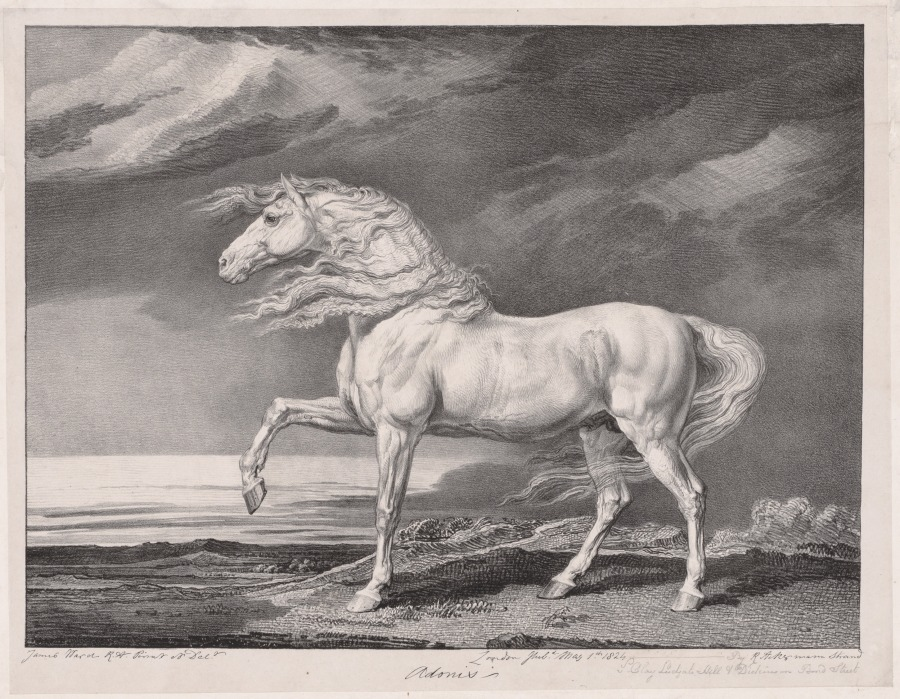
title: Fourteen Celebrated Horses: Adonis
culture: England, 19th century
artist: James Ward (British, 1769–1859)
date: 1824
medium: lithograph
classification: Print